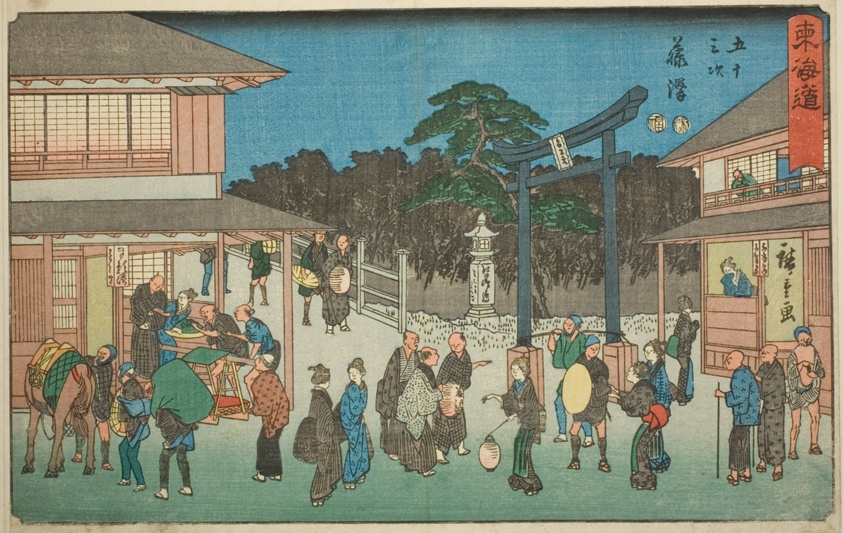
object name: Print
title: Fujisawa—No. 7, from the series "Fifty-three Stations of the Tokaido (Tokaido gojusan tsugi)," also known as the Reisho Tokaido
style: Japanese (culture or style)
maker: Utagawa Hiroshige 歌川 広重; Japanese, 1797-1858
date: c. 1847/52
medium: Color woodblock print; oban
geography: Japan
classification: woodblock print; print; asian art